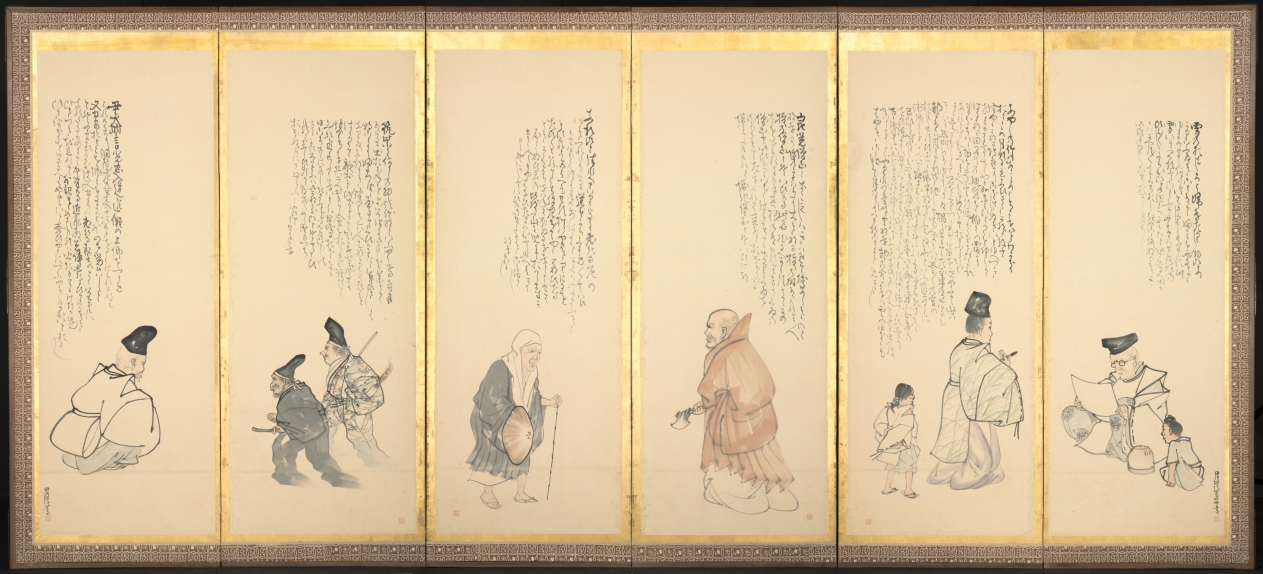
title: Scenes from Essays in Idleness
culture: Japan, Edo period (1615–1868)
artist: Matsumura Goshun (Japanese, 1752–1811)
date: late 1700s–early 1800s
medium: One of a pair of six-panel folding screens; ink and color on paper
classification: Painting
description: Matsumura Goshun inscribed passages from Buddhist monk Yoshida Kenkō’s (1283–1350) well-known collection of anecdotes, Essays in Idleness, across the top of the panels of this screen and its pair. Goshun illustrated the narratives with his vision of the figures who feature in them. The texts cascade down from right to left, forming unique compositional relationships with the images below. The episodes offer a veritable portrait of human idiosyncrasy, from one man’s deep faith in radishes to another’s inability to avoid nicknames.